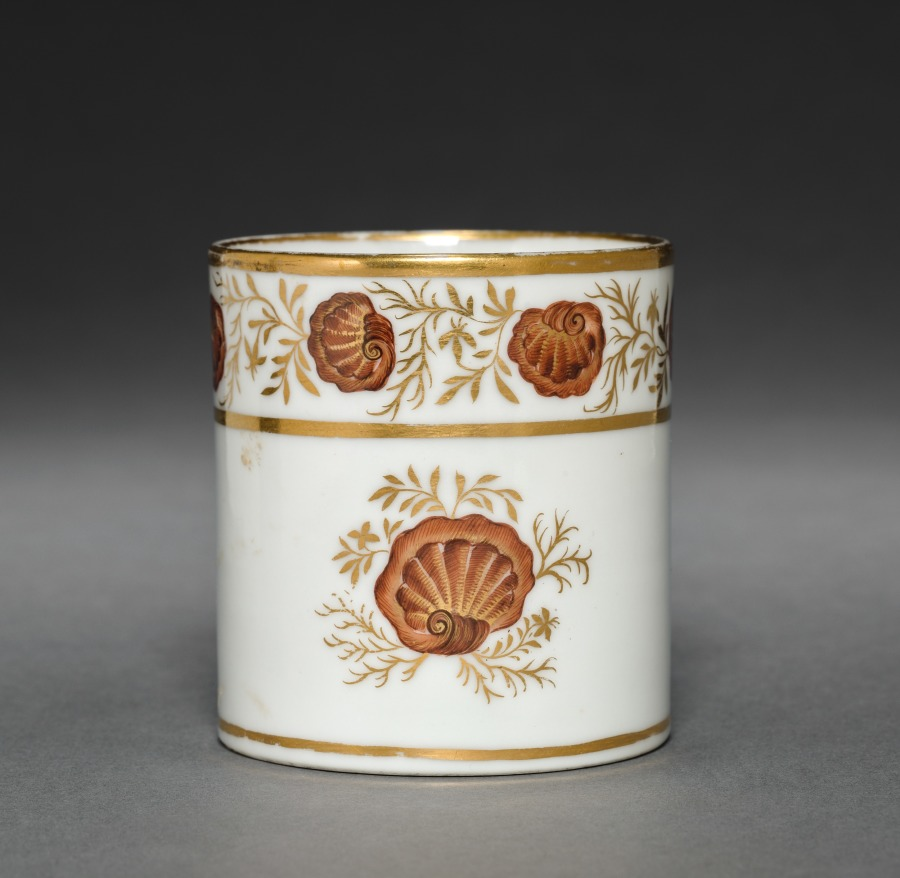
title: Cup from Oliver Wolcott, Jr. Tea Service (6 of 6)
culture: Chinese Export porcelain, late 18th-early 19th century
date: 1785–1805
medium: porcelain, sepia enamel, gold leaf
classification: Ceramic